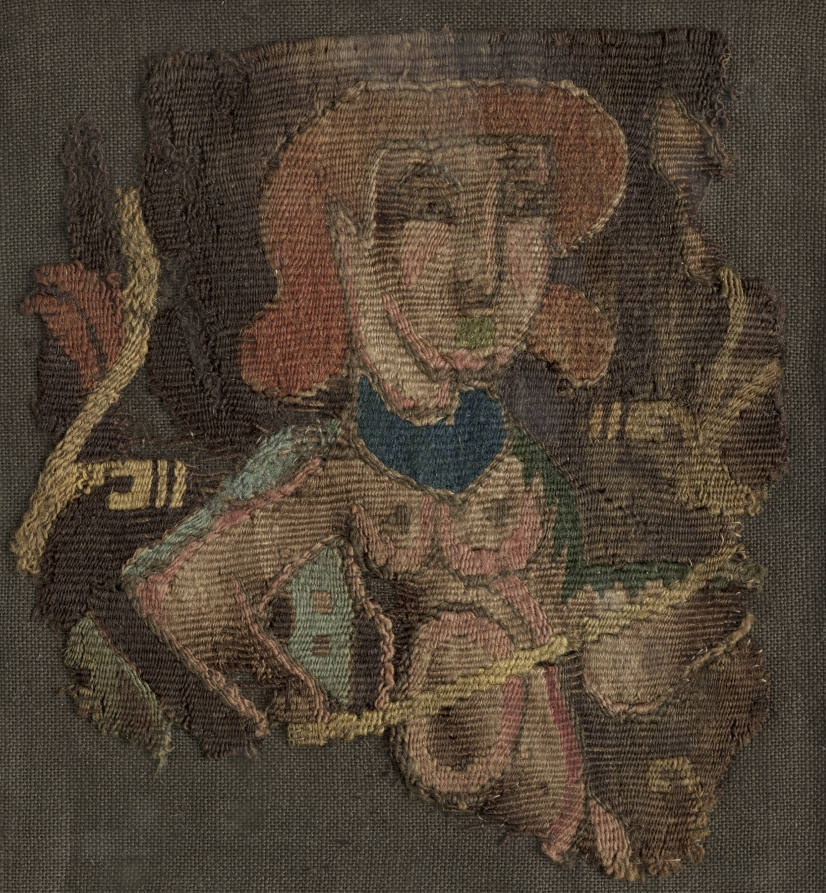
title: Fragment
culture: Egypt, Byzantine period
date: 600s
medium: tapestry weave: wool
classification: Textile